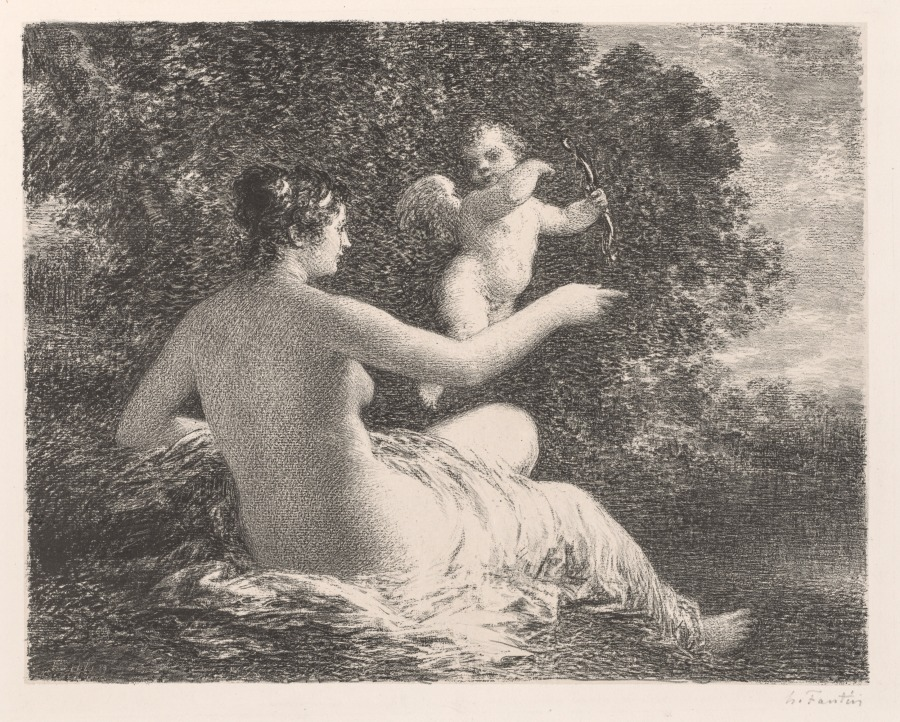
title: Venus and Cupid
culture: France, 19th century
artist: Henri Fantin-Latour (French, 1836–1904)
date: 1896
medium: lithograph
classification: Print